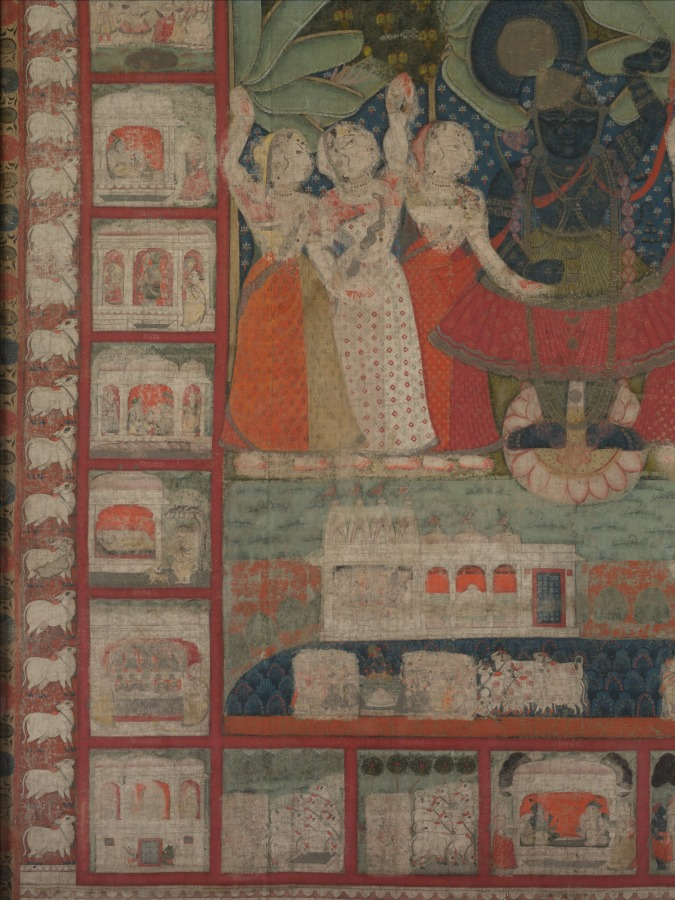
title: Pichvai of Shri Nathji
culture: Northwestern India, Rajasthan, Nathdwara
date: 1825–50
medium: Gum tempera, silver, and gold on cotton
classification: Painting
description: Painted-cloth devotional wall hangings (pichvai) form the backdrop to the worship of Krishna as Shri Nathji. As a result of long-term exposure, these textiles are usually faded and worn. The icon of Krishna as Shri Nathji is the central figure. On either side of him, milkmaids with arms entwined join him in a state of ecstasy. Experiencing the bliss of divine play (lila) with Krishna is the main religious goal for followers of the Pushti Marg sect of Hinduism to which this work belongs. Episodes from the life of Krishna and a border of adoring cows frame the central scene.